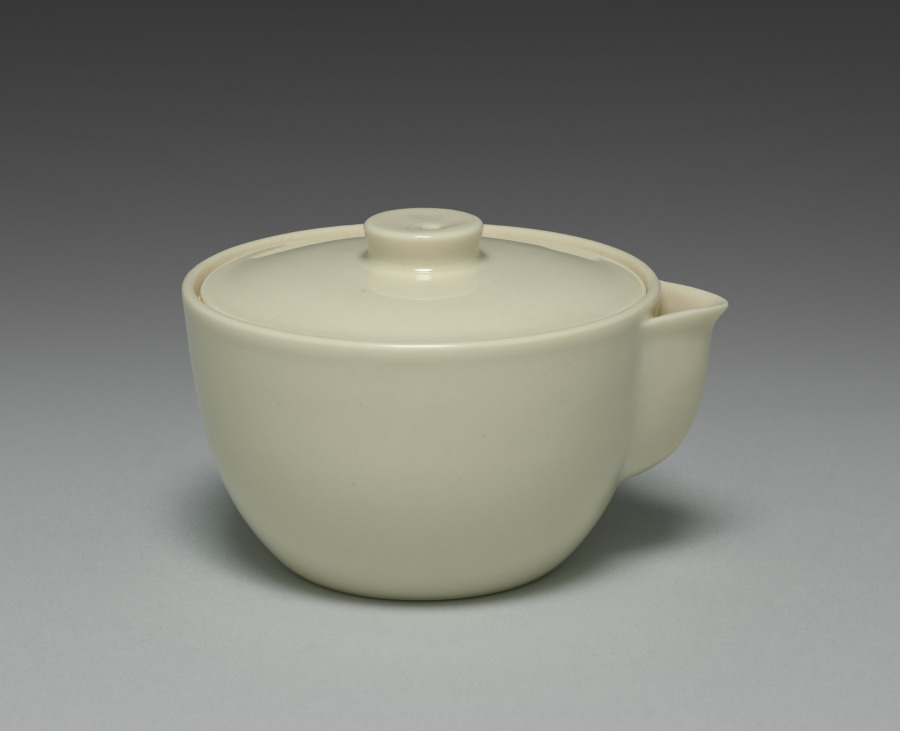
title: Hand-held Teapot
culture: Japan, Meiji period (1868–1912)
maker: Seifū Yohei III (Japanese, 1851–1914)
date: 1893–1914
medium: Porcelain with molded and carved design and cream glaze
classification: Ceramic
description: This teapot is of a variety used by advanced sencha practitioners. Called a hōhin, the pot is designed to be held directly by the fingers, with the body touching the upper part of the palm. This shape allows the host to manipulate the pot with a single hand and demonstrate dexterity. Direct contact between the ceramic body and the hand allows the host to closely gauge the temperature of the water within. There are differing grades of sencha, and for the finest one, gyokuro, the water temperature must be carefully regulated to achieve the proper flavor. This vessel is therefore efficacious for preparing this high-quality tea. The hōhin is also extremely portable, so it is well suited for impromptu gatherings. According to its box, this teapot is an example of taihakuji. “Great-white porcelain” was an important early invention Yohei III devised in 1972. It involved the combination of a distinctive translucent, creamy glaze over an ivory-colored clay body.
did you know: This pot’s restrained design includes on the lid’s handle a yin-yang motif, symbolizing the ideal balance between the forces of the universe.